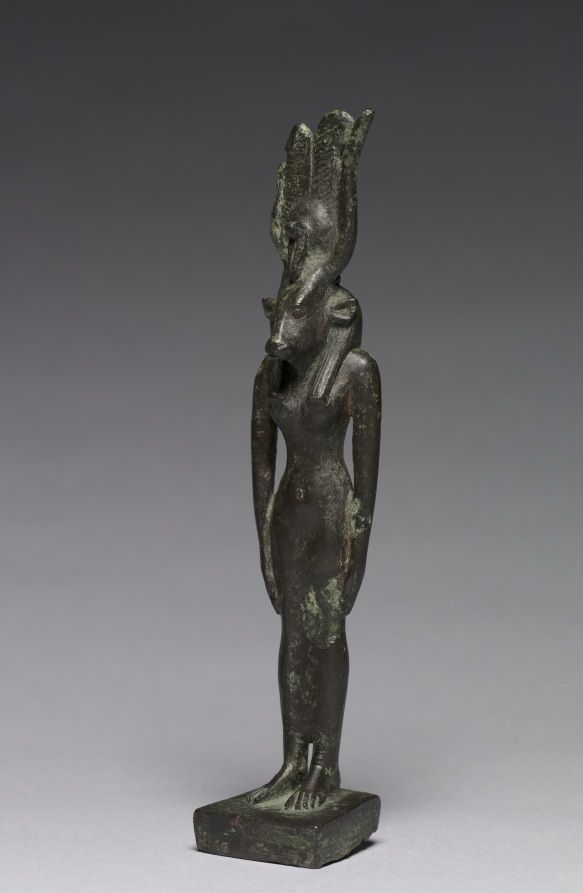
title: Statuette of Hathor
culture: Egypt, Late period (715–332 BCE), Dynasty 26 or later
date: 664–30 BCE OR 664–330 BCE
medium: bronze, solid cast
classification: Sculpture